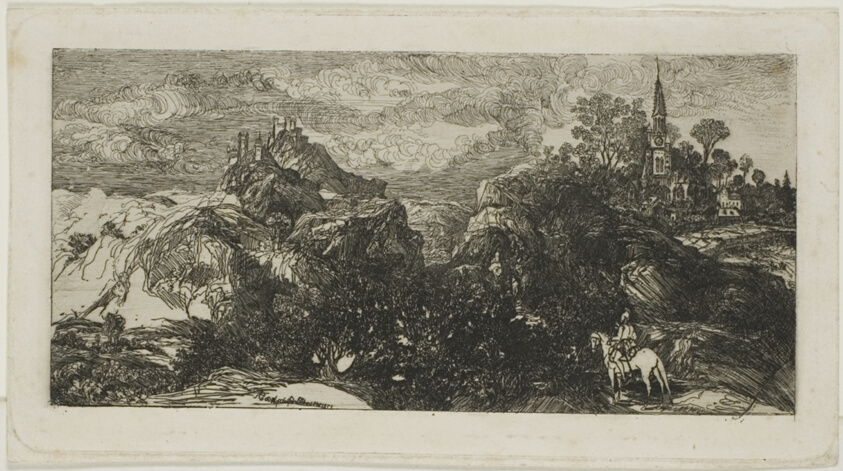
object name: Print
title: The Knight's Return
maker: Rodolphe Bresdin (French, 1825-1885)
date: 1871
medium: Etching on ivory wove paper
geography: France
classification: etching; print; prints and drawing